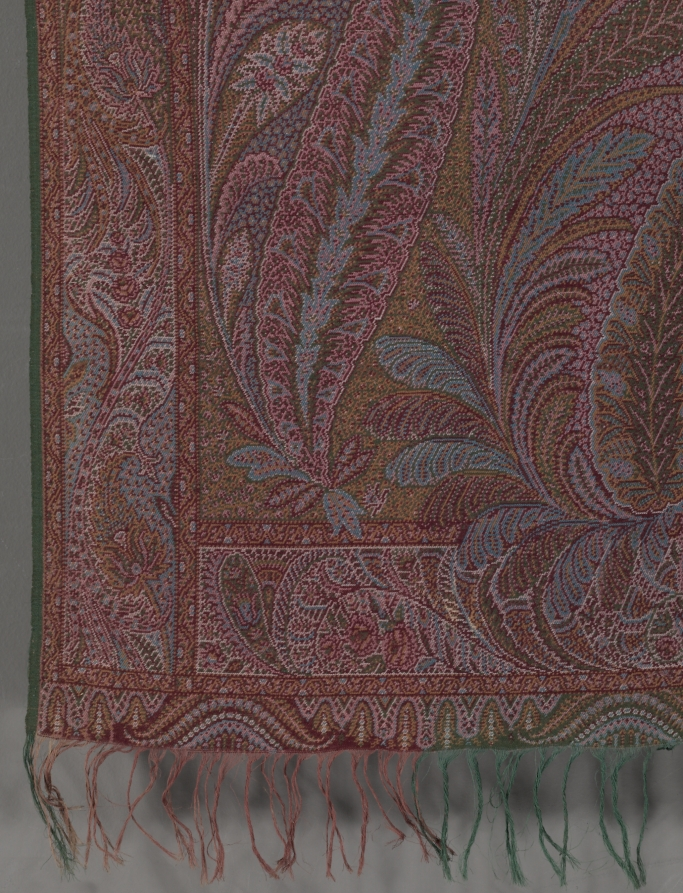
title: Square shawl with Quarter Shawl Layout and Ivory Center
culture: Austria, England, France, or Scotland, 19th century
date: 1848–51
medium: wool; 3/1 twill weave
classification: Textile